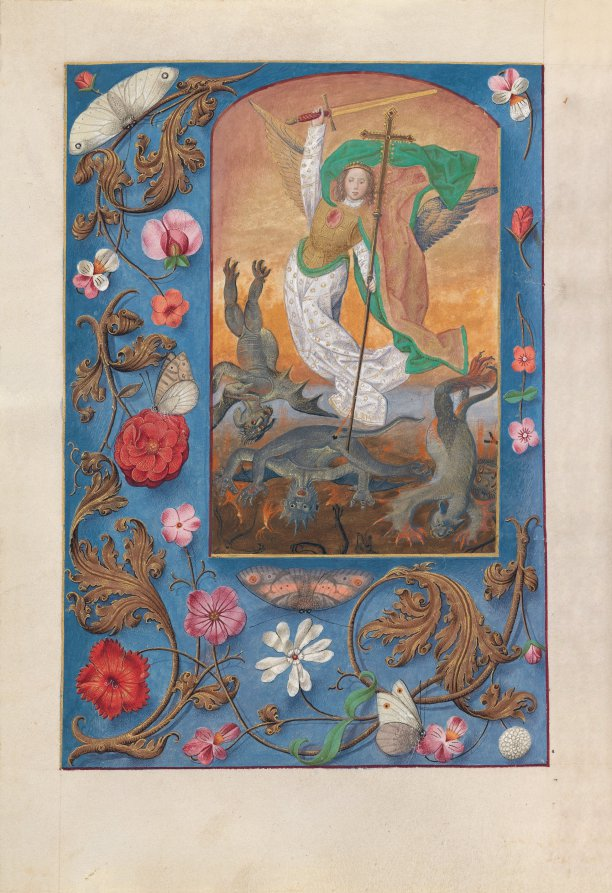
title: Hours of Queen Isabella the Catholic, Queen of Spain: Fol. 167v, St. Michael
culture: Flanders, Ghent and Bruges, late 15th century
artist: Master of the First Prayerbook of Maximillian (Flemish, c. 1444–1519)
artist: and Associates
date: c. 1500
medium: ink, tempera, and gold on vellum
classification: Bound Volume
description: This manuscript was illuminated by a circle of at least five highly organized manuscript painters active in the Flemish cities of Ghent and Bruges. The principal illuminator was Alexander Bening, who painted the majority of the book's miniatures. Manuscripts produced by this circle of artists are renowned for the decoration of their borders, which typically feature a rich variety of realistically-painted flowers, birds, and butterflies. This prayer book, called a book of hours, was intended not for a cleric, but for the private devotions of a lay person-in this case, Isabella the Catholic, Queen of Spain (1451-1504). Isabella's coat of arms embellishes the book's frontispiece. It is unlikely that the book was commissioned by the Queen herself; rather, she probably received it as a diplomatic gift from someone courting her patronage, perhaps Cardinal Francisco Jimenez de Cisneros. A Franciscan friar, Jimenez was dependent upon Isabella for his advancement, first to the post of Queen's confessor in 1492, and then to Archbishop of Toledo in 1495.